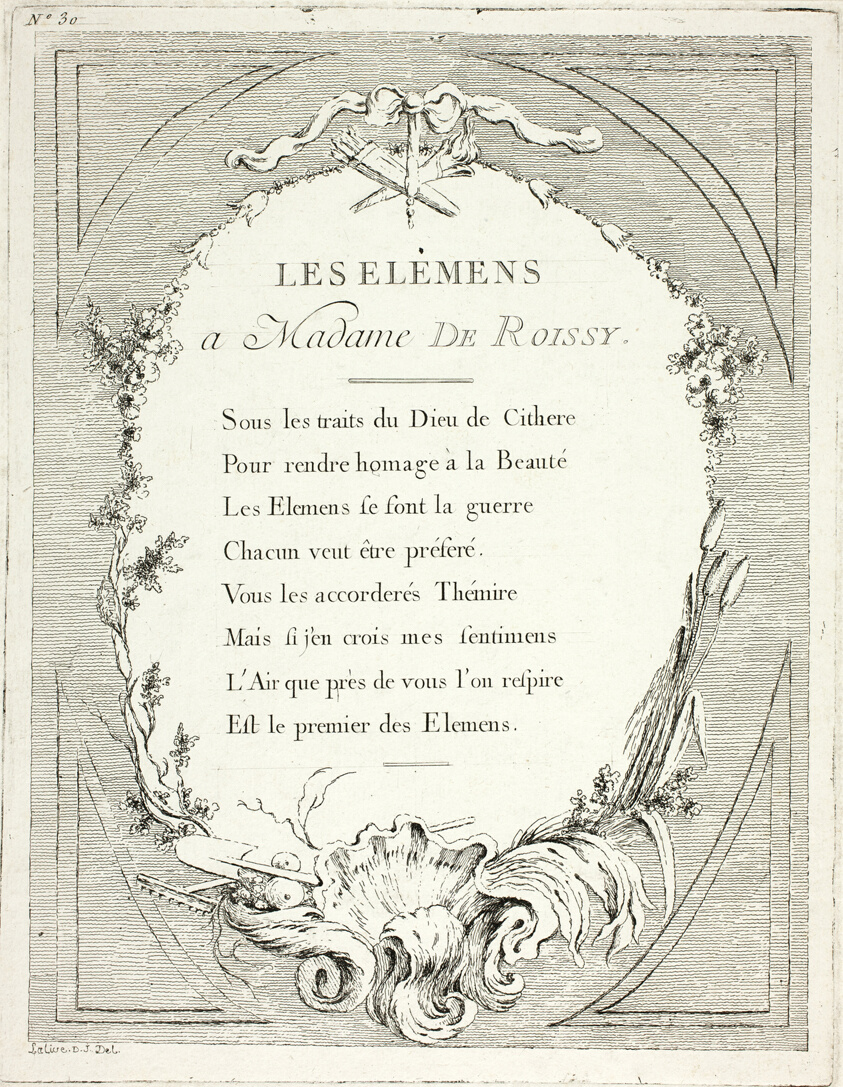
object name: Print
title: Frontispiece, from Élements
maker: Ange Laurent de La Live de Jully; French, 1725-1779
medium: Etching in black on ivory laid paper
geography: France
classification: etching; paper; print; prints and drawing